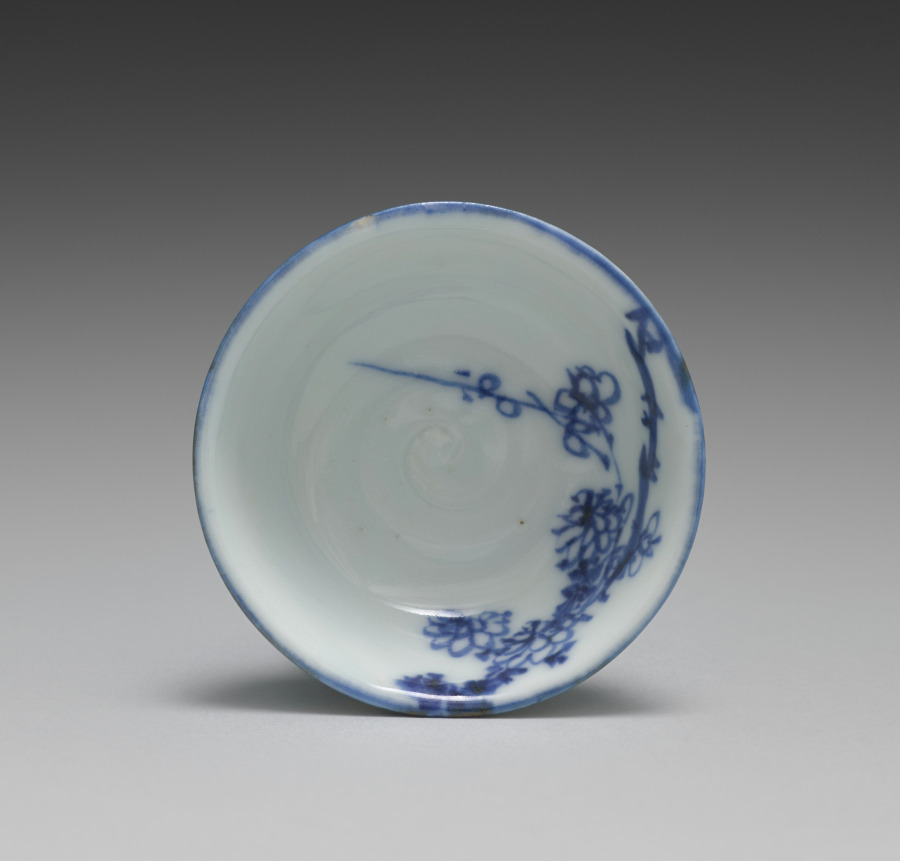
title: Sake Cup with Auspicious Plants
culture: Japan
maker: Seifū Yohei II (Japanese, 1844–1878)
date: 1861–78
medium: One of a pair of sake cups; porcelain with underglaze blue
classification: Ceramic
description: Seifū Yohei II excelled as a painter, as evidenced by his floral and landscape designs. His works were selected as the best among Kyoto ceramics shown to jurists from Europe and the US, thus paving the way for international recognition of the studio in the late 1800s.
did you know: Orchid, bamboo, chrysanthemum, and plum all appear on this cup and have associations with the four seasons.